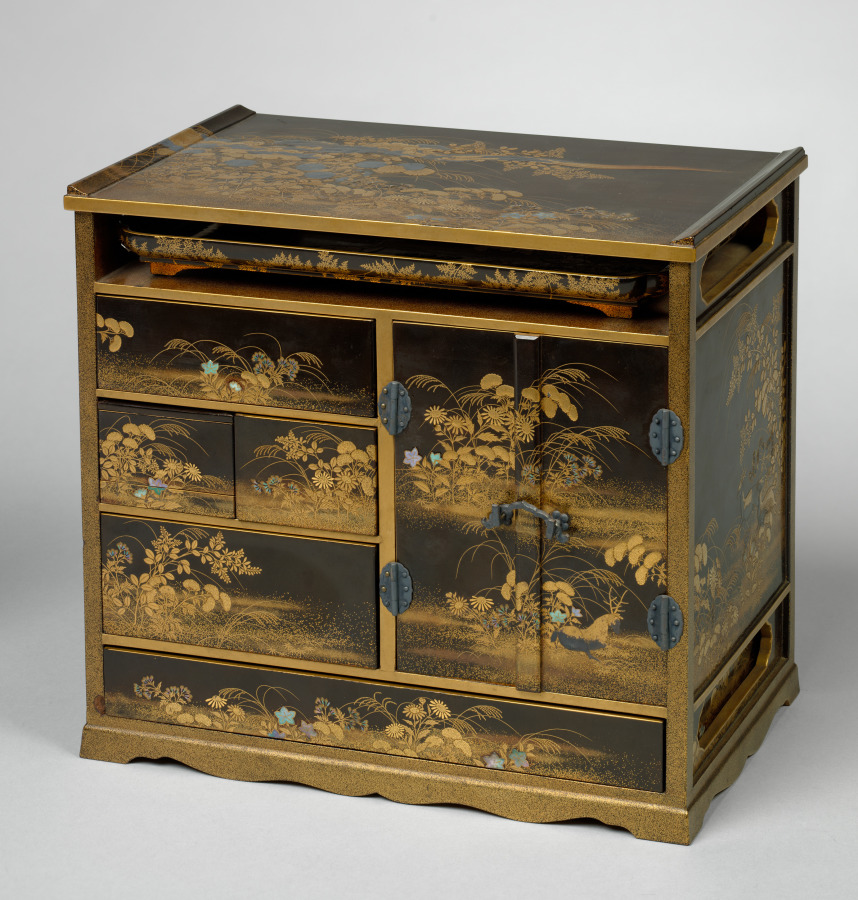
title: Ten-Round Incense Game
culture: Japan, Edo period (1615–1868)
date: 1700s–mid-1800s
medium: Lacquered wood with gold and silver sprinkled powder (maki-e) and mother-of-pearl inlay, metal fittings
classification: Lacquer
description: A popular pastime in the Edo period was a game in which a group of players passed around incense and guessed its name or scent. Small pieces of incense would be placed on thin mica plates and heated over hot ash, releasing their aroma for the players to smell. Players then cast their guesses with playing pieces. The game master kept score with the writing set. This game is handsomely decorated with images of deer in an autumn setting.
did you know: The blue and white porcelain containers in which the heated incense was passed feature designs of foreigners.